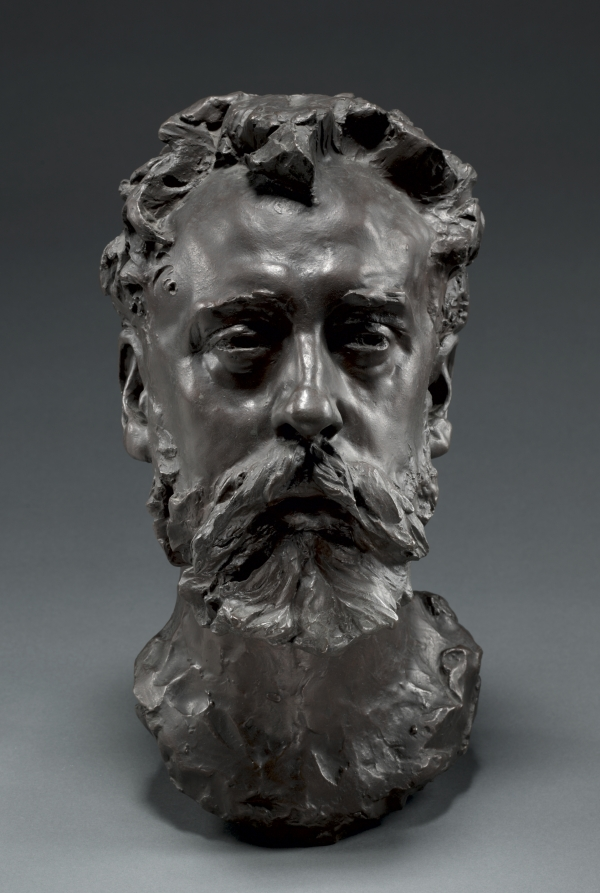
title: Portrait of William E. Henley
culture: France, 19th century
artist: Auguste Rodin (French, 1840–1917)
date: 1882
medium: bronze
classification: Sculpture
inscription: inscribed on back: Rodin.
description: A poet and dramatist, William Henley (1849–1903) was the editor of the British Magazine of Art from 1882 to 1886. He enthusiastically introduced Rodin's sculpture to his readers, even before the artist's work was well known in Paris. To thank him, Rodin made this bust.